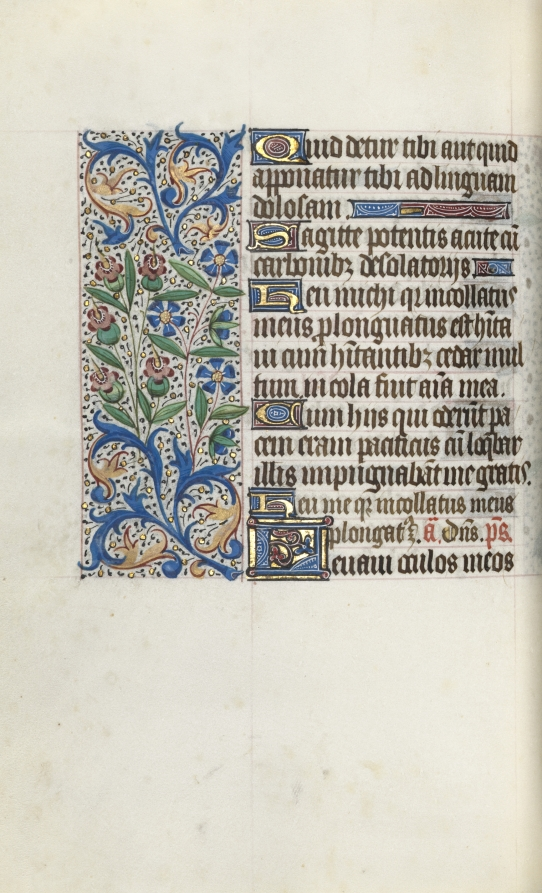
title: Book of Hours (Use of Rouen): fol. 104v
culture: France, Rouen, 15th century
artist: Master of the Geneva Latini (French, active Rouen, 1460–80)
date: c. 1470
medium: ink, tempera, and gold on vellum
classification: Bound Volume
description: In the late 1400s and early 1500s Rouen was an established and important center of book production. The city’s cathedral had a wealthy chapter that spent large sums of money to commission books and to maintain its extensive library. The stationers and booksellers would have likely been concentrated in or near the cathedral precinct. This artist, named after a manuscript now in Geneva, was Rouen’s principal illuminator during the second half of the 1400s.